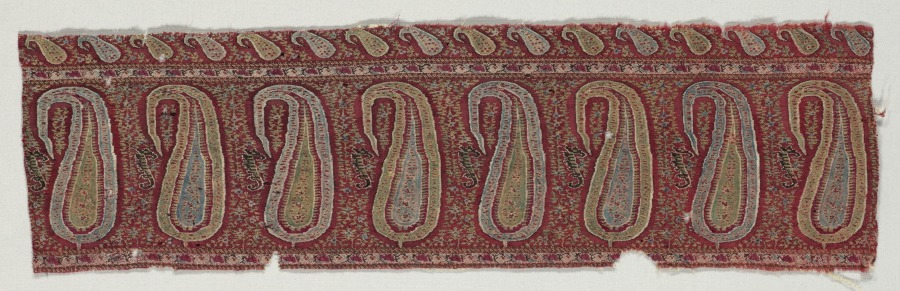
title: Border of a Shawl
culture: India, Punjab, 19th century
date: 1800s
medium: tapestry twill; wool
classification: Textile